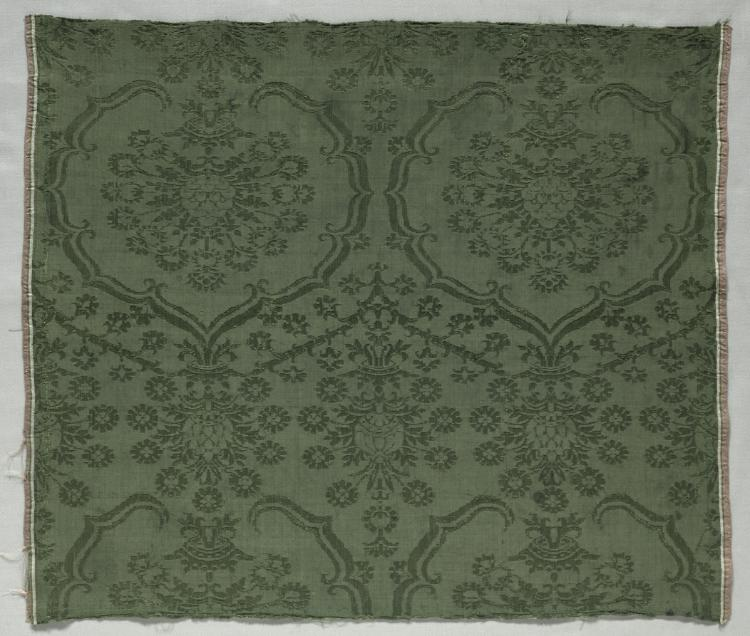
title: Silk Damask Textile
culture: Italy, second half of the 15th century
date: 1450–1599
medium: damask, silk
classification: Textile